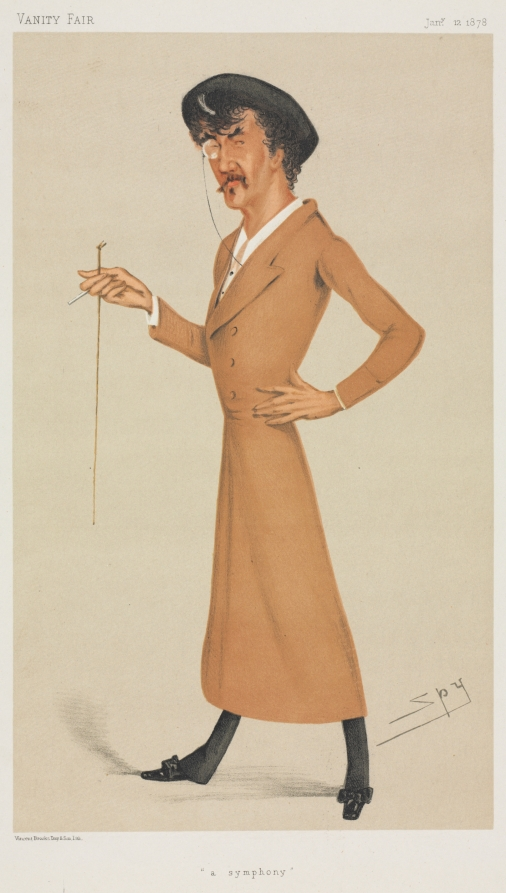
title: Vanity Fair: A Symphony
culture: England, 19th century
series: Vanity Fair January 12, 1878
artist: Leslie Matthew (Spy) Ward (British, 1851–1922)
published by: Vincent Brooks Day & Son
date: 1878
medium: color lithograph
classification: Print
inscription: Lower right, in pencil: "18'" verso, lower left: "N48663" Inscribed in stone: artist monogram "Spy" upper left: "VANITY FAIR" upper right: "Jany 12 1878" lower left: "Vincent Brooks Day & Son Ltd." lower center: "A Symphony"